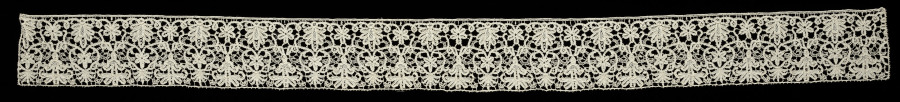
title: Lace Edging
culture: Italy, Venice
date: 1600s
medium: Needle lace (mezzo punto) and bobbin lace (tape lace)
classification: Lace